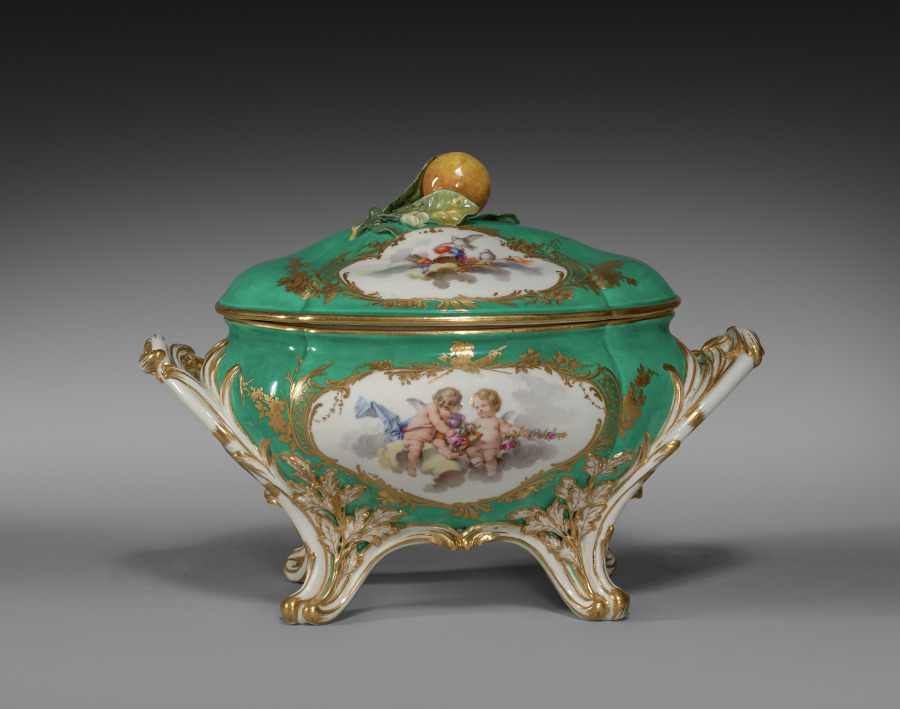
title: Covered Tureen (Terrine du roi)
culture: France, Sèvres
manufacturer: Sèvres Porcelain Factory (French, est. 1756)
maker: attributed to Charles Nicolas Dodin (French, 1734–1803)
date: 1756–57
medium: soft-paste porcelain with enamel and gilt decoration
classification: Ceramic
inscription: [Interlaced L's]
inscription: [Date letter 'D' (in cursive with a dot on either side)]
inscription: [Incised 'b']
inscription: [Incised '6']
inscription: [Inventory numbers in red enamel]: "r.u./710" [base of tureen]; "r.u./710a" [on lid]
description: This tureen’s striking green background, or fond vert, was a major advancement for the Sèvres Porcelain Factory, known for their innovation in and mastery of color. Traditionally the largest, most expensive item in an 18th-century French dinner service, this tureen was part of a porcelain dining set presented to King Frederick V of Denmark by French King Louis XV in 1758.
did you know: French King Louis XV was a great patron of the decorative arts; he acquired the Sèvres Porcelain Factory in 1759.